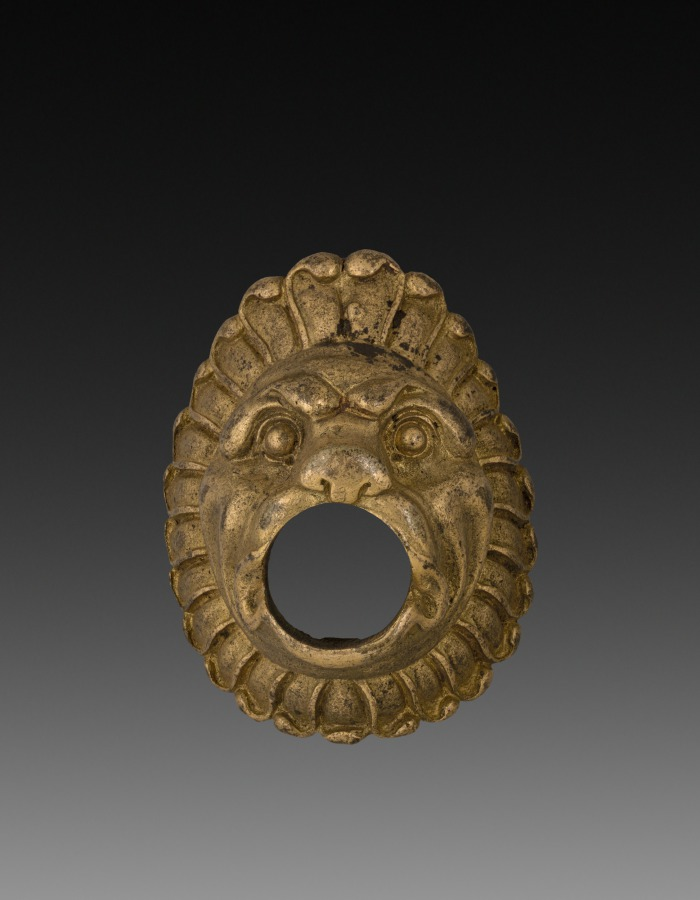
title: Ornamental Detail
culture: France, 19th century, Empire Style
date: c. 1800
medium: gilt bronze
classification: Metalwork